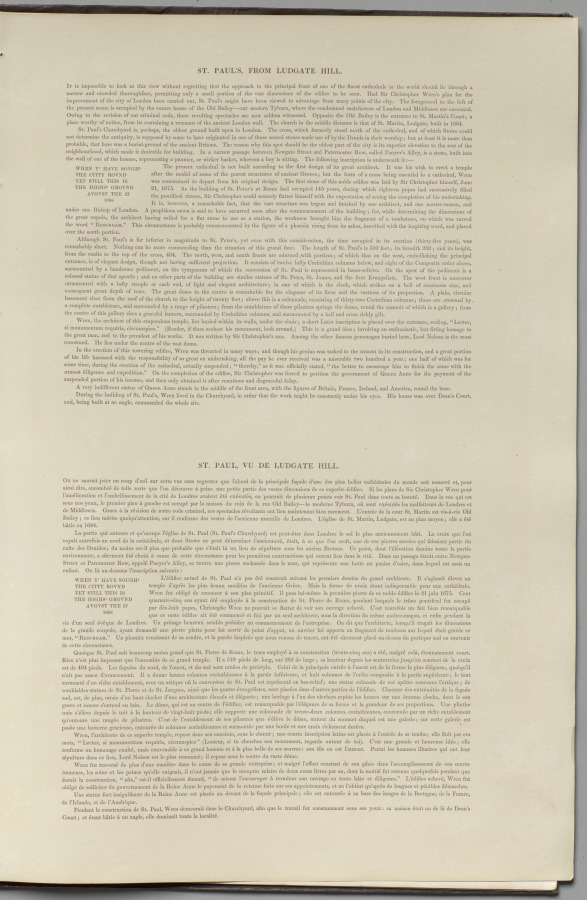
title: London As It Is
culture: England, 19th century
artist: Thomas Shotter Boys (British, 1803–1874)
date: 1842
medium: lithograph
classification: Bound Volume